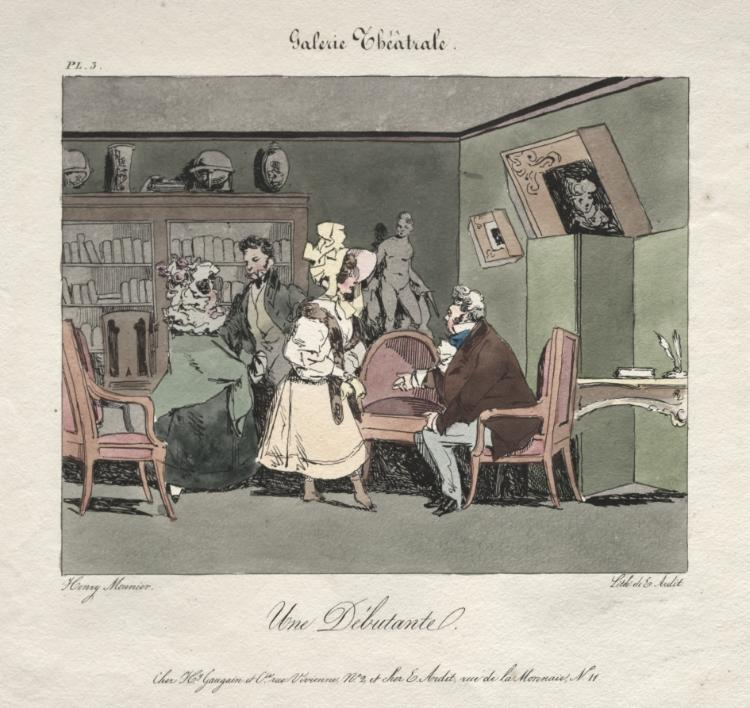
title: Débutante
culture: France, 19th century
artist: Henry Bonaventure Monnier (French, 1805–1877)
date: c. 1828–30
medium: color lithograph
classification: Print